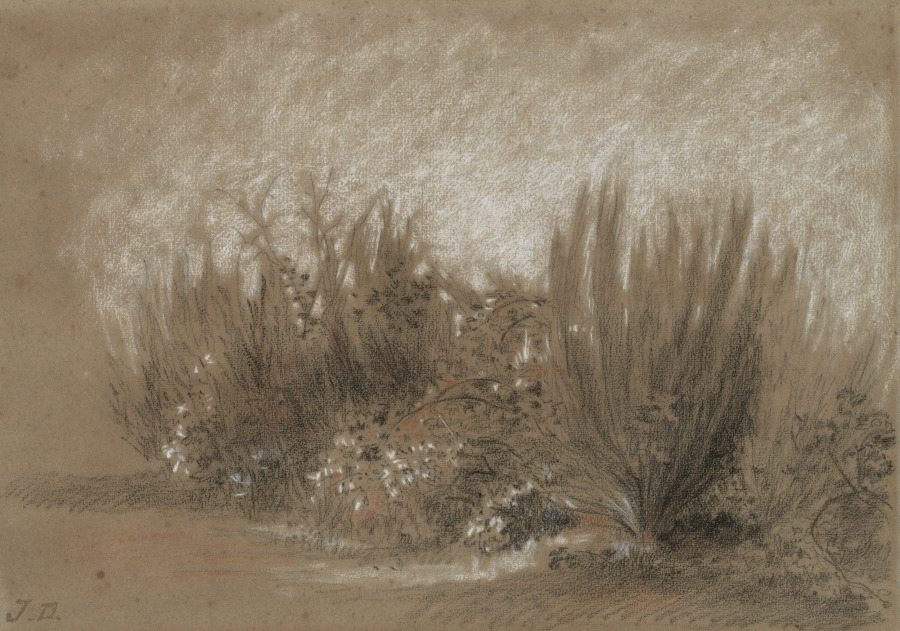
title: Genets et Ronces (Broom and Brambles)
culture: France, 19th century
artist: Jules Dupré (French, 1811–1889)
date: 1860s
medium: Black, white, and red chalk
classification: Drawing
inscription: lower left, in brown wash: JD